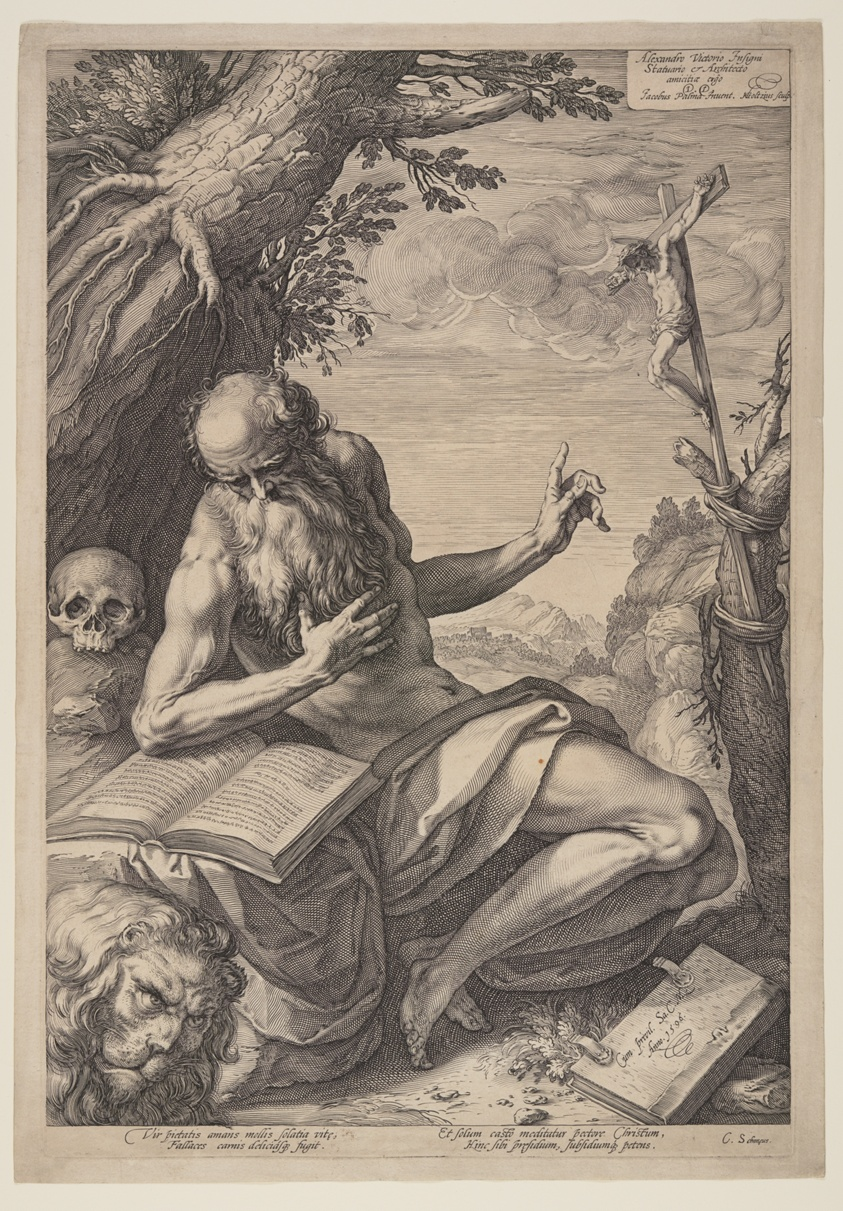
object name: Print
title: St Jerome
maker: Hendrick Goltzius (Dutch, 1558–1617); after Jacopo Palma il Giovane (Italian, 1544–1628)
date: 1596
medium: Engraving on ivory laid paper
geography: Netherlands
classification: engraving; paper; print; prints and drawing